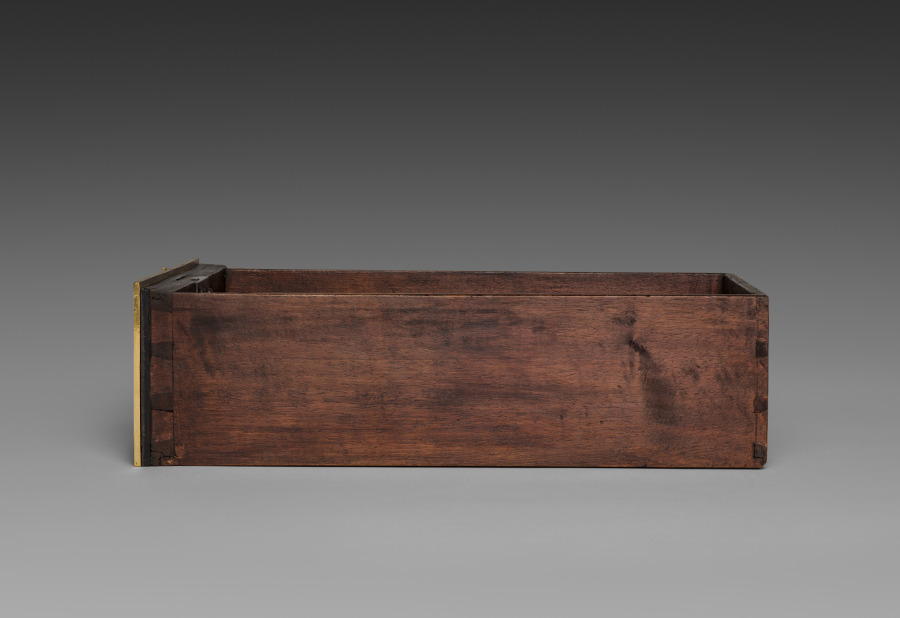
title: Side Drawer for Cabinet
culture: France, late 17th Century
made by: André-Charles Boulle (French, 1642–1732)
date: c. 1690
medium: ebony, marquetry in metal and tortoise shell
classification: Furniture and woodwork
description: Appointed cabinetmaker to King Louis XIV in 1672, André-Charles Boulle became a master of furniture making in France during the late 1600s until his death in 1732. Known primarily for his use of marquetry, in which metal patterns are inlaid into tortoiseshell then applied within the veneered surface of the furniture, Boulle established a level of quality and craftsmanship few others could achieve. As a result, his work found favor at the royal court and among other aristocrats and diplomats eager to impress the king. The inclusion of a medallion depicting Louis XIV within the bronze decoration of this chest would have identified the owner with the royal court. Often exhibiting stout architectural proportions with elegant groups of inlaid motifs such as the parrot on the central panel of this chest, Boulle’s designs are an example of the intellectual fashion for contrasting ideas, materials, and motifs.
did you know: Originally designed to sit atop an elaborate tall stand, this chest was likely altered in the late 1700s to reduce its scale and height.